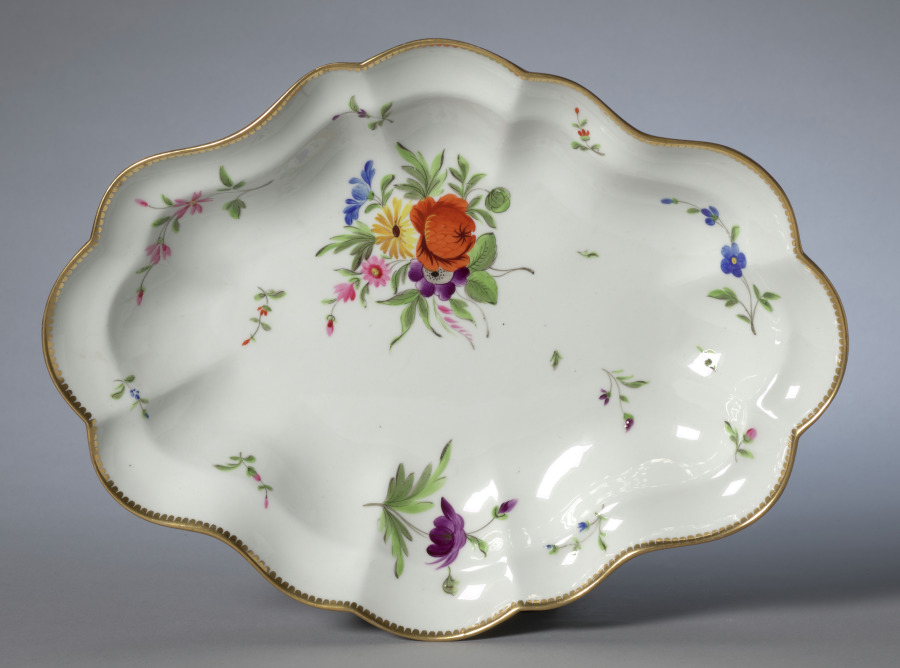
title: Dish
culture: England, 19th century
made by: Worcester Porcelain Factory (British, established 1751)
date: 1820–1840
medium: porcelain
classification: Ceramic